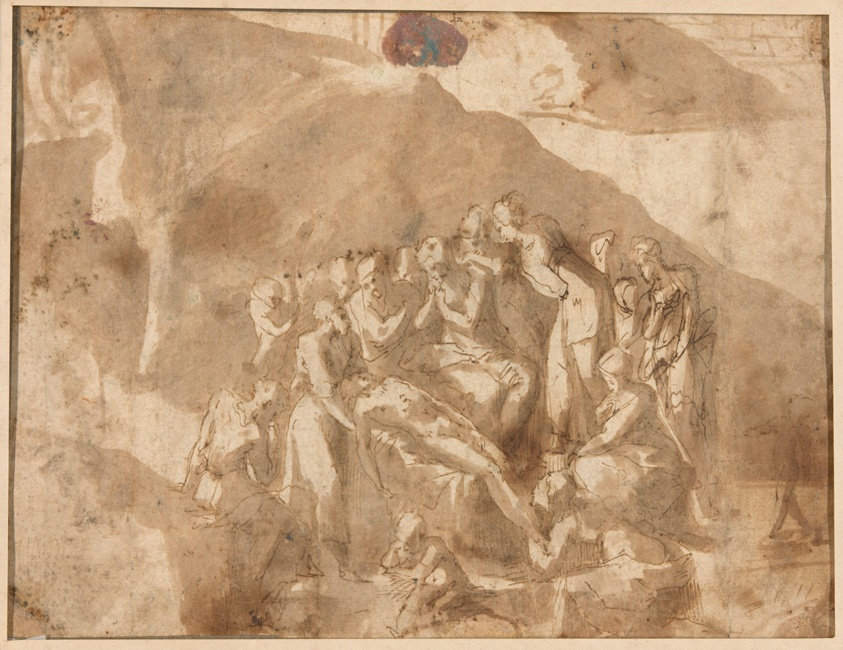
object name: Drawing and Watercolor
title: The Lamentation of Christ (recto and verso)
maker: Polidoro da Caravaggio (Italian, c. 1499–c. 1543)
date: 1527/35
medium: Pen and brown ink, with small splatters of opaque green, gray and pink paint, with touches of white gouache (recto) and pen and brown ink and brush and brown wash (verso) on ivory laid paper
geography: Italy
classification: pen and ink drawings; paper; drawings (visual works); prints and drawing